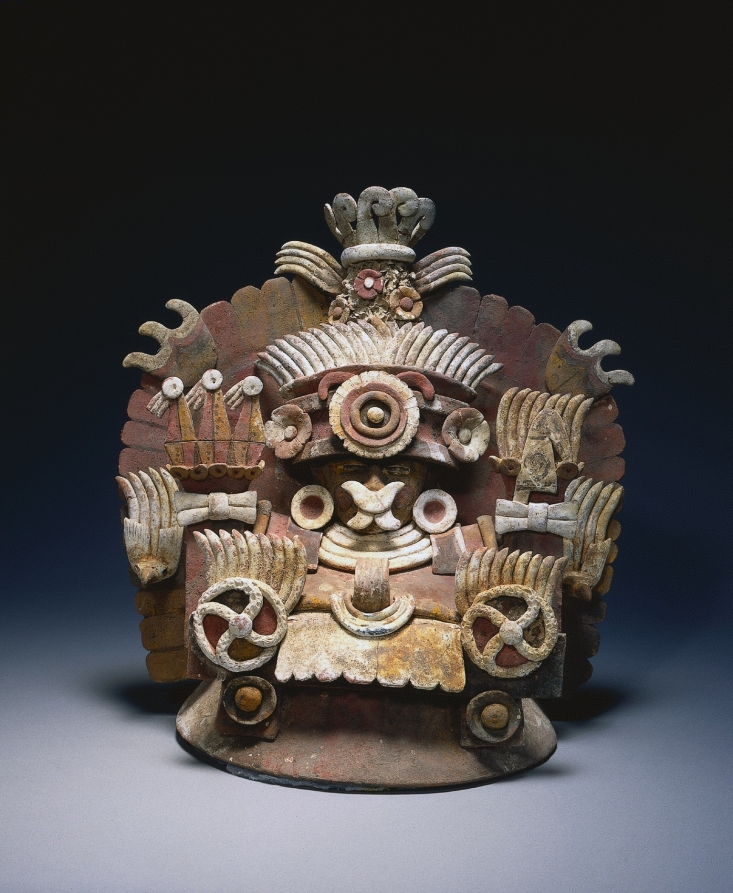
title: Incense-burner Cover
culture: Guatemala, Escuintla Region, early 6th Century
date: c. 500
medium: earthenware with slip and pigments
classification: Ceramic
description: This elaborate clay construction served as the cover and chimney of a basin used to burn copal incense. Although probably manufactured in what is now Guatemala, the form and fabrication are based on examples from Teotihuacan in central Mexico, hundreds of miles away. Intensive trade between the two regions, or even a Teotihuacan colony in Guatemala seems likely. The masked, dressed, and ornamented moundlike form probably represents a mortuary bundle or a cult image.